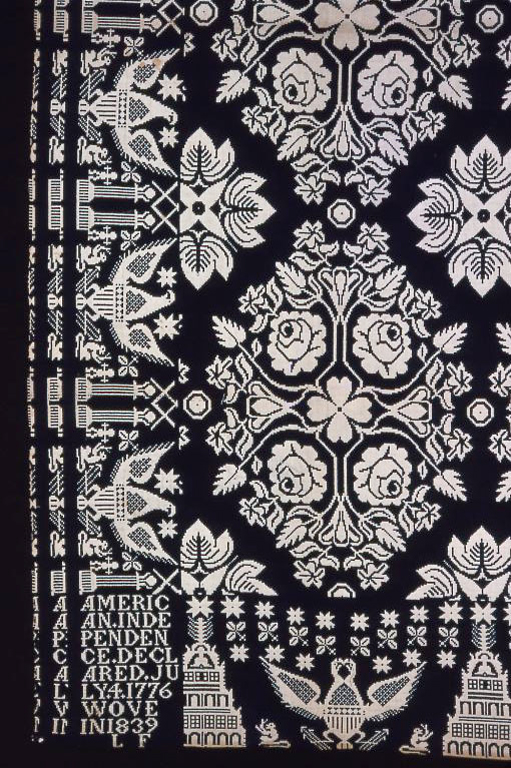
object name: Textile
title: Coverlet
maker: Attributed to James Alexander (American, born Irish, 1770–1870); United States, New York, Orange County, Little Britain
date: 1839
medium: Cotton and wool, plain weave double cloth; two loom widths joined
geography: New York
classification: textile; coverlet; weaving - coverlet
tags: coverlet